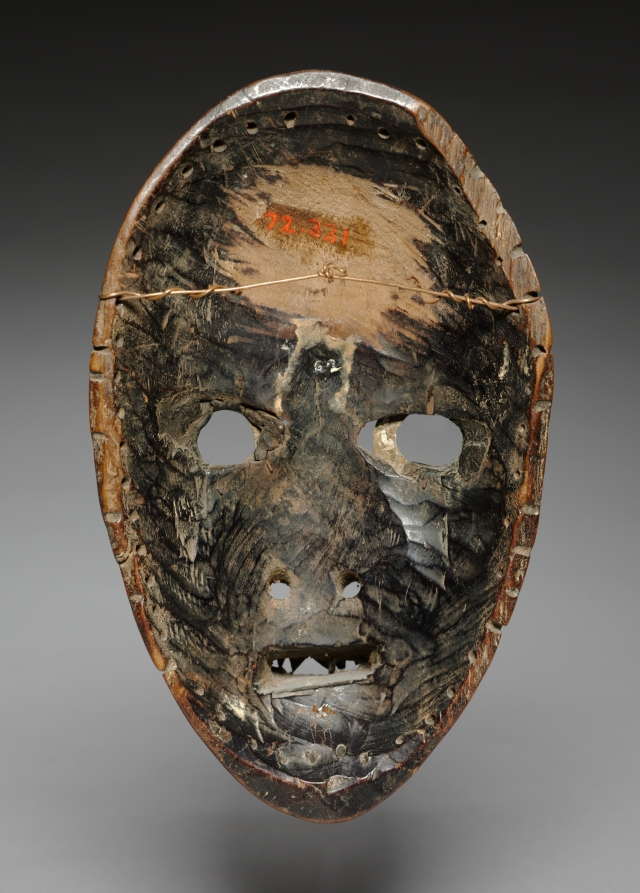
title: Face Mask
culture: Africa, West Africa, Côte d'Ivoire or Liberia, Dan-style maker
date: possibly early 1900s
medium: Wood, metal, leather, and organic materials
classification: Mask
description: A Dan face mask's use and the costume that accompanied it are important elements that contribute to the name it receives. While we don't know those details, we can say it originally had an elaborate fiber hairstyle attached through the holes around the edge. Based on its appearance and other similar examples, this face mask with a high forehead in northern Dan style may have been called either sagbwe or gunyege. As a "runner mask," it was engaged in running competitions once organized every Sunday during the dry season. As a "fire-watcher," its main task was to protect the village from fire when the dangerous desert wind called Harmattan blew during the dry season.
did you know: The eyes of this mask were altered from slits to circles; the original shape is most visible on the right eye.